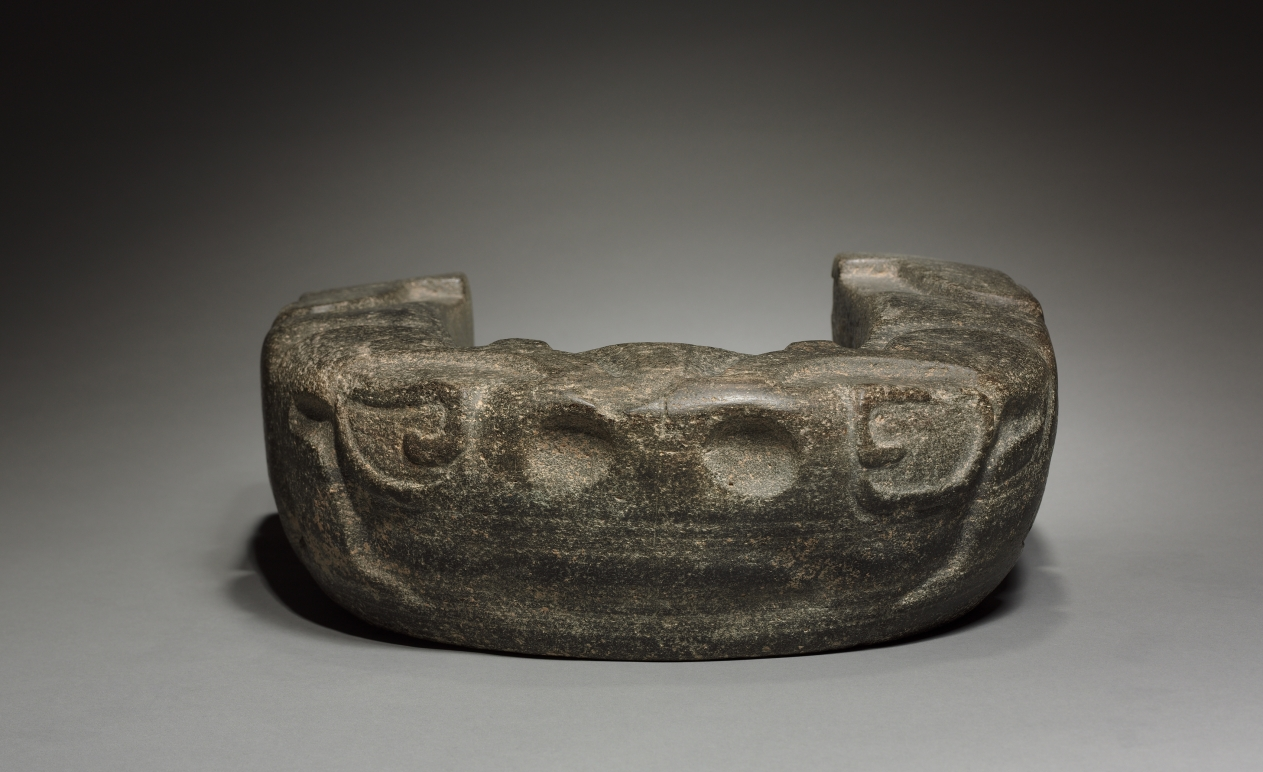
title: Unfinished Yoke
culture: Mexico, Central Veracruz, Classsic Veracruz style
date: 600–900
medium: gray stone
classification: Sculpture